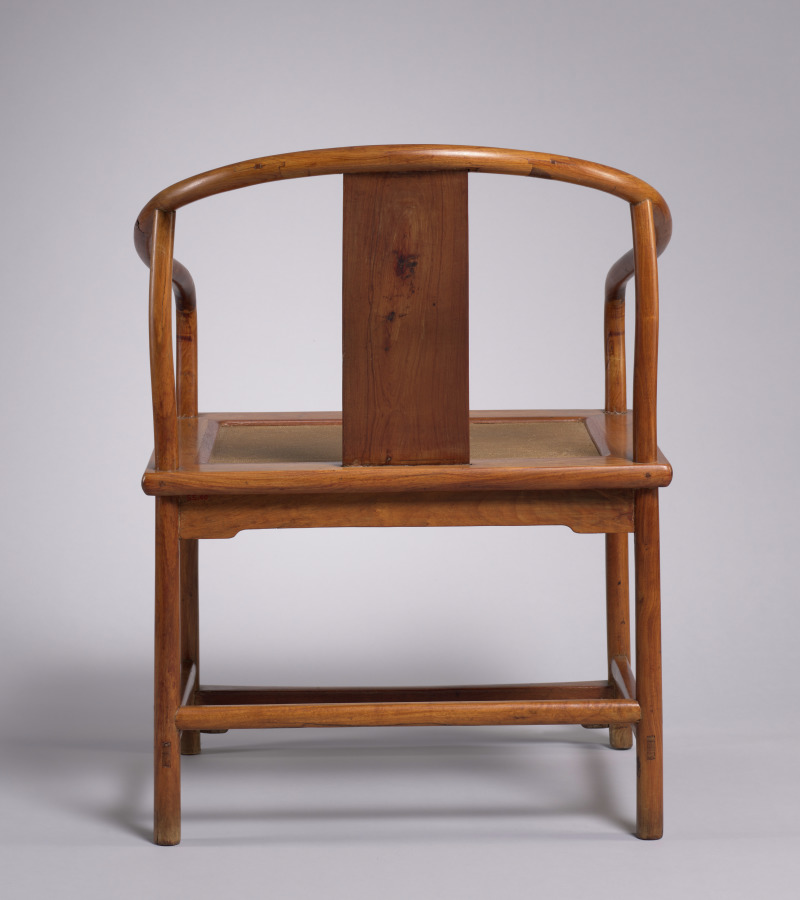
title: Roundback Armchair: Lohan Type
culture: China, Ming dynasty (1368–1644) to Qing dynasty (1644–1911)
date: 1600s–1700s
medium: Rosewood (huanghuali)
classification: Furniture and woodwork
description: In history, China moved from an original floor culture to high chairs and tables, developing a unique tradition of craftsmanship. Although still relatively unexplored, the manufacturing and styles of furniture differ by region. This horseshoe-back armchair was made in Jiangsu province. Its simplicity and minimalist elegance is characteristic of Suzhou-style furniture and aesthetics. The back of the chair is made of seven pieces of wood, joined and secured with an inserted wooden pin, a mortise-tenon technique that appeared in its earliest form in Neolitihic fragments of the Hemudu culture.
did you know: The horseshoe-shaped back of this chair is joined without glue or nails.